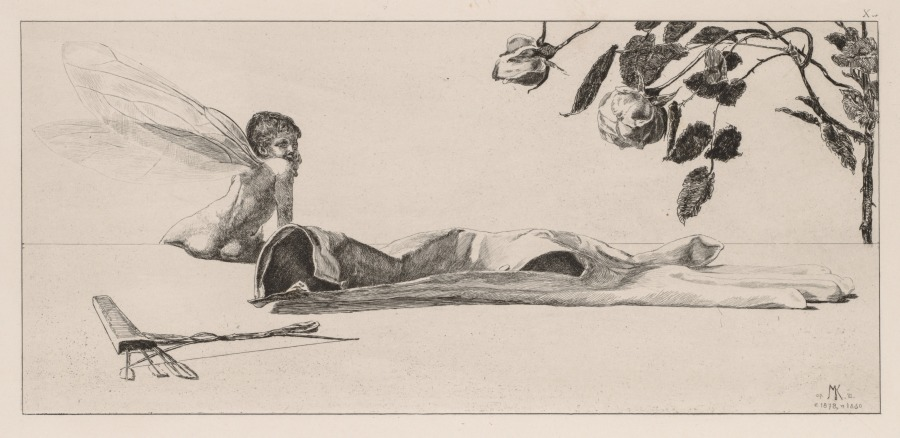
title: A Glove: Amor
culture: Germany, 19th century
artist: Max Klinger (German, 1857–1920)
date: 1880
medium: etching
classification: Print